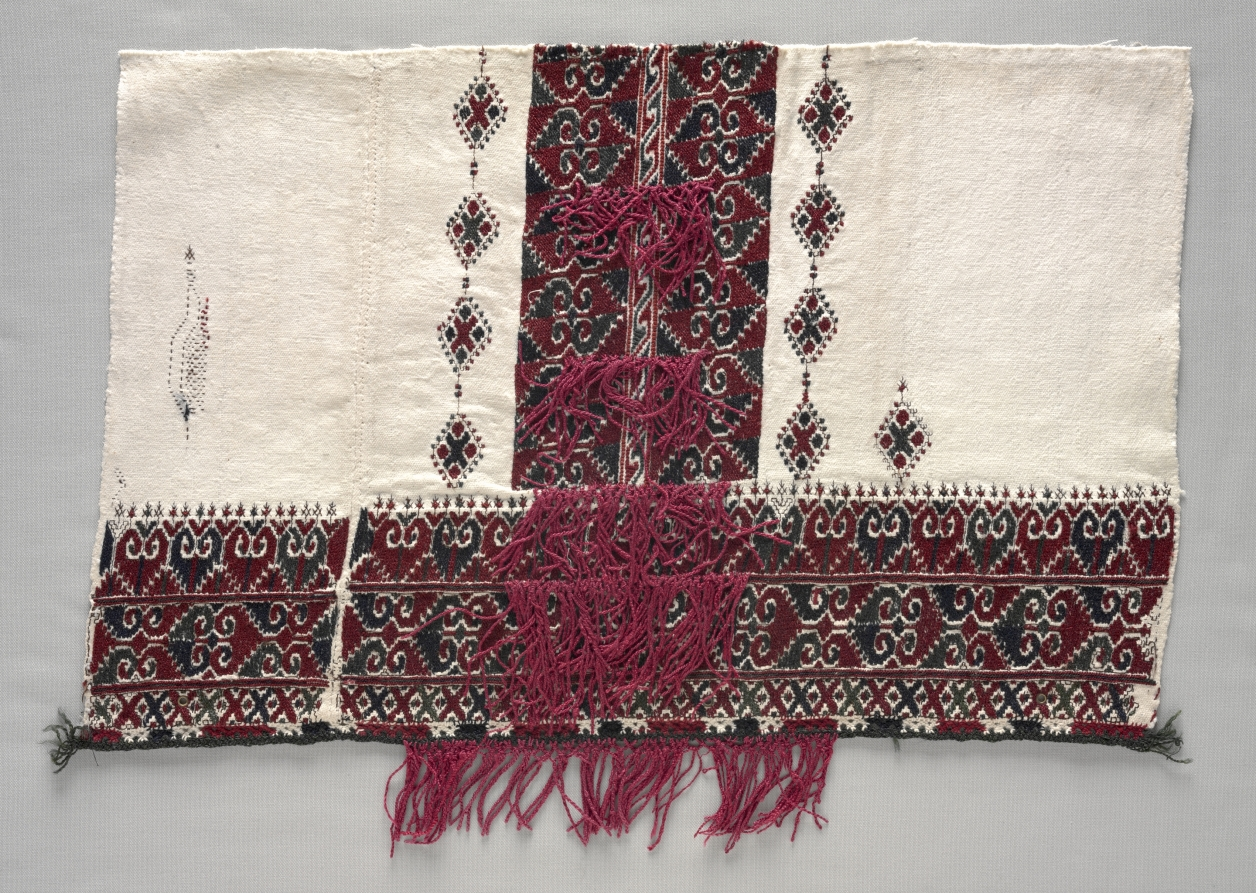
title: Sleeve (?)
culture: Greece, Thrace, Sarakatsani People, 19th century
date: 1800s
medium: embroidery: silk on cotton tabby ground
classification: Embroidery